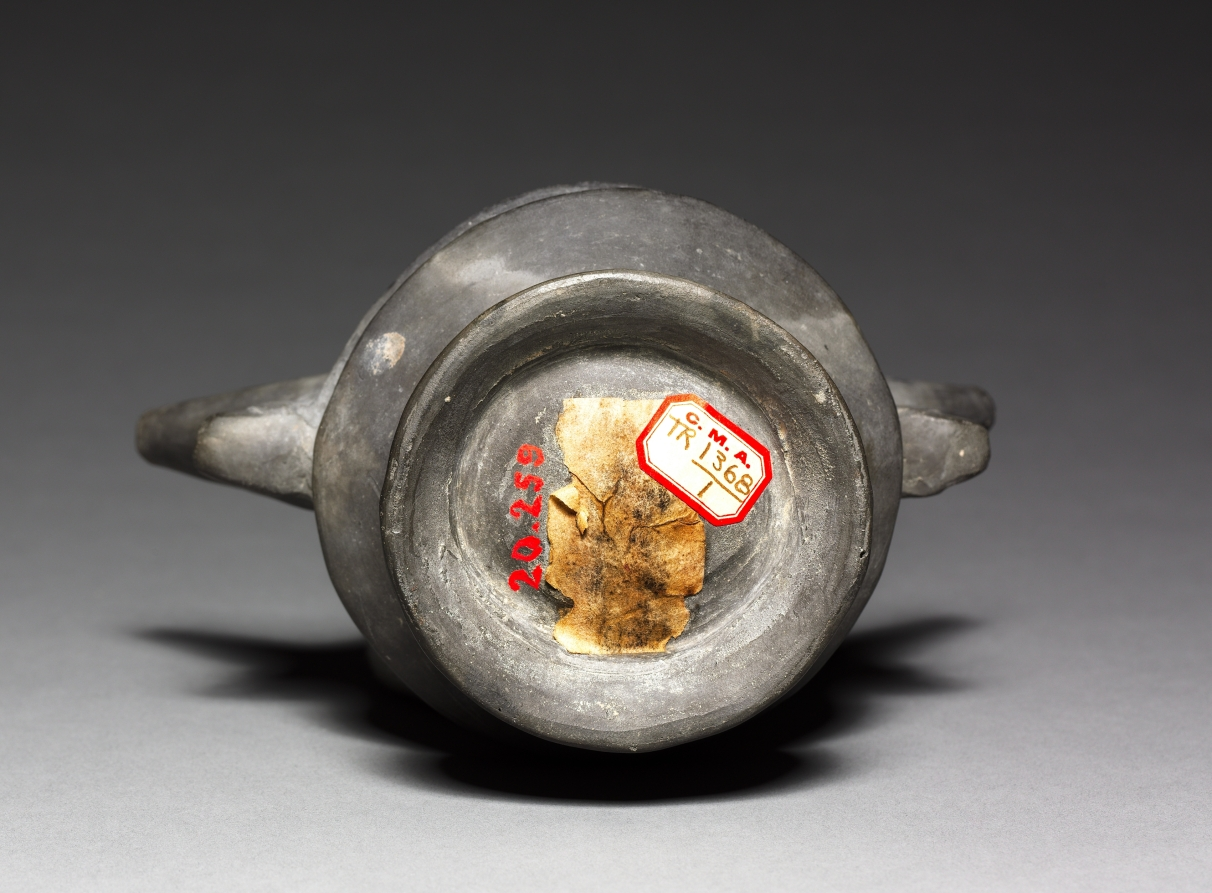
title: Vessel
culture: Peru, Chimú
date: 1300–1400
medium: black ware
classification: Ceramic